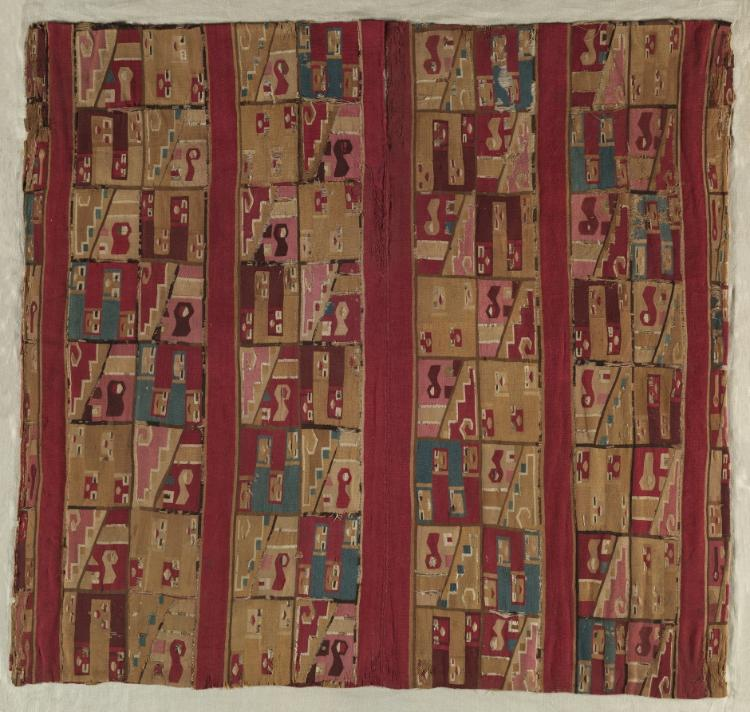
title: Tunic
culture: Peru, South Coast, Wari Culture, Middle Horizon, 8th-12th Century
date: c. 700–1100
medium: tapestry; interlocked wefts and areas of eccentric weaving: wool and cotton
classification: Textile